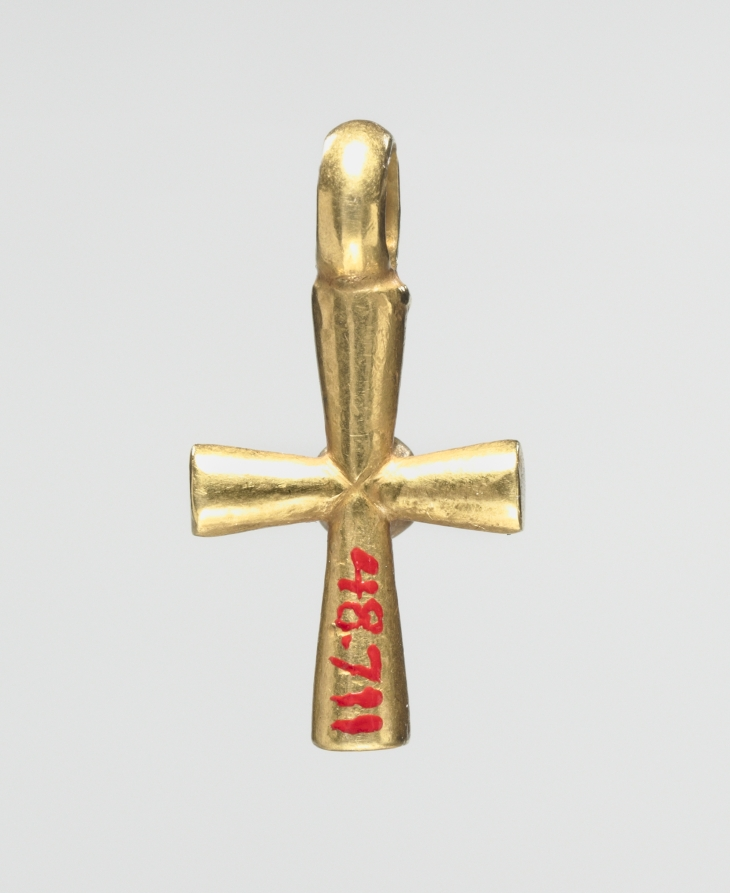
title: Pendant Cross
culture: Byzantium, early Byzantine period, 6th century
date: 500s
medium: gold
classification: Jewelry